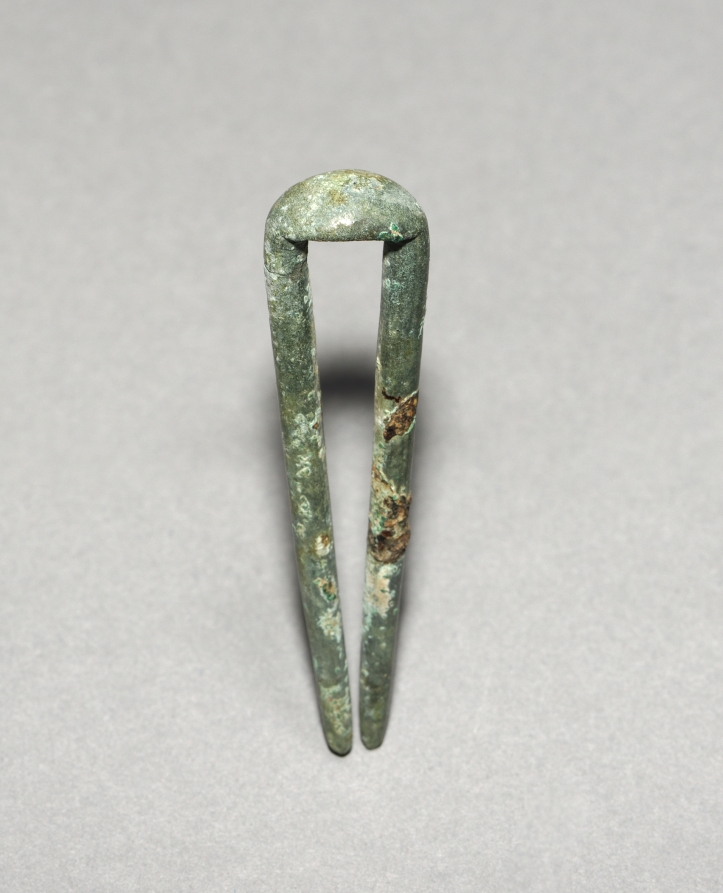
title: Topknot Pin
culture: Korea, Goryeo dynasty (918–1392)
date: 918–1392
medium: bronze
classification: Metalwork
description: Metallurgy advanced remarkably in the Goryeo period (918–1392), explaining why a large quantity of sophisticated metal artifacts were used not only as daily accessories but also as burial goods. Men put their hair in a knot at the top of their heads. To keep their long hair from falling, a bronze pin such as this one was used.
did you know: This bronze hairpin was for a man to fix his topknot.